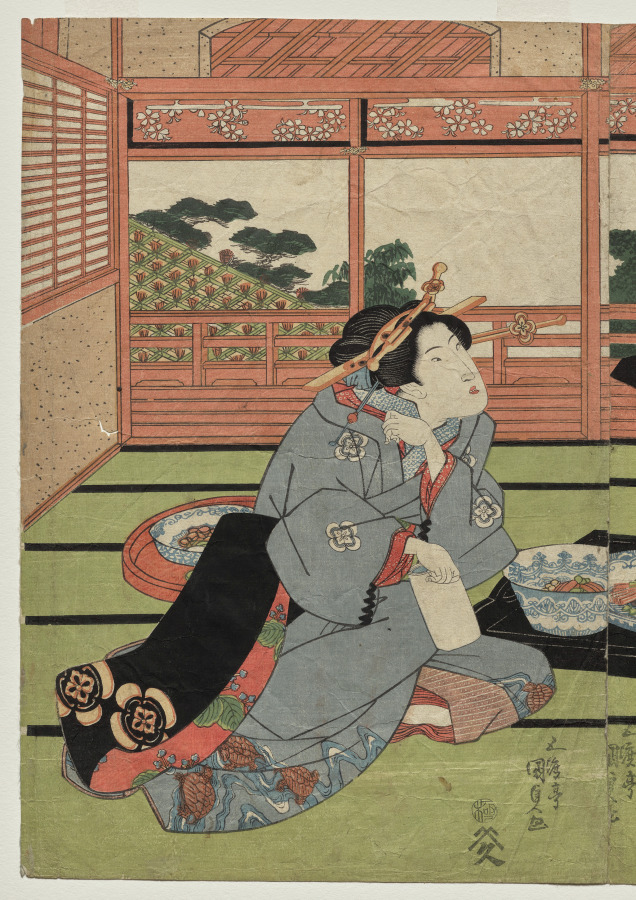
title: A View of the Large New Room at Sakurai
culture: Japan, Edo period (1615–1868)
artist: Utagawa Kunisada (Japanese, 1786–1865)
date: early or mid 1830s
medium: color woodblock print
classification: Print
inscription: Signature: Gototei Kunisada ga Publisher: Yamamotoya Keikichi (emblem) Censorship Seal: kiwame